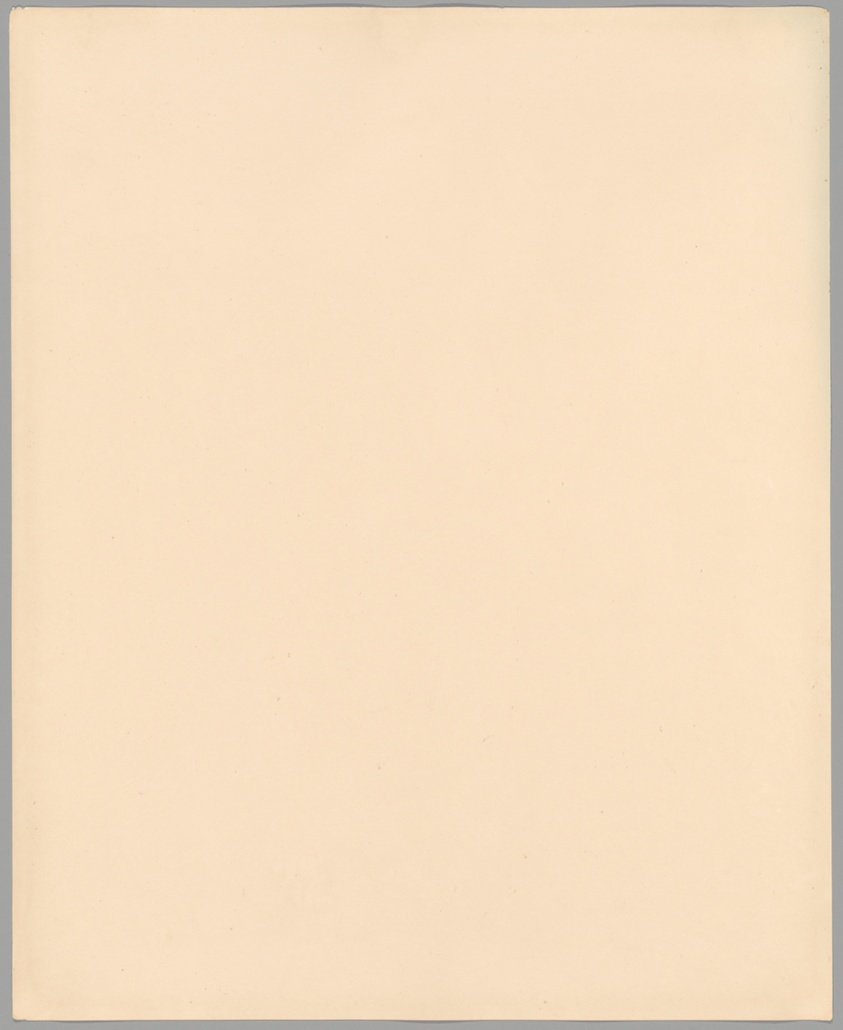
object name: Photograph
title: Climbing up the Beams on the Empire State-100 Stories Up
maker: Lewis Wickes Hine (American, 1874–1940)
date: 1931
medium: Gelatin silver print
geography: United States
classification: gelatin silver (developing-out-paper) pr; photographic process; photography; photograph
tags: cityscapes, documentary